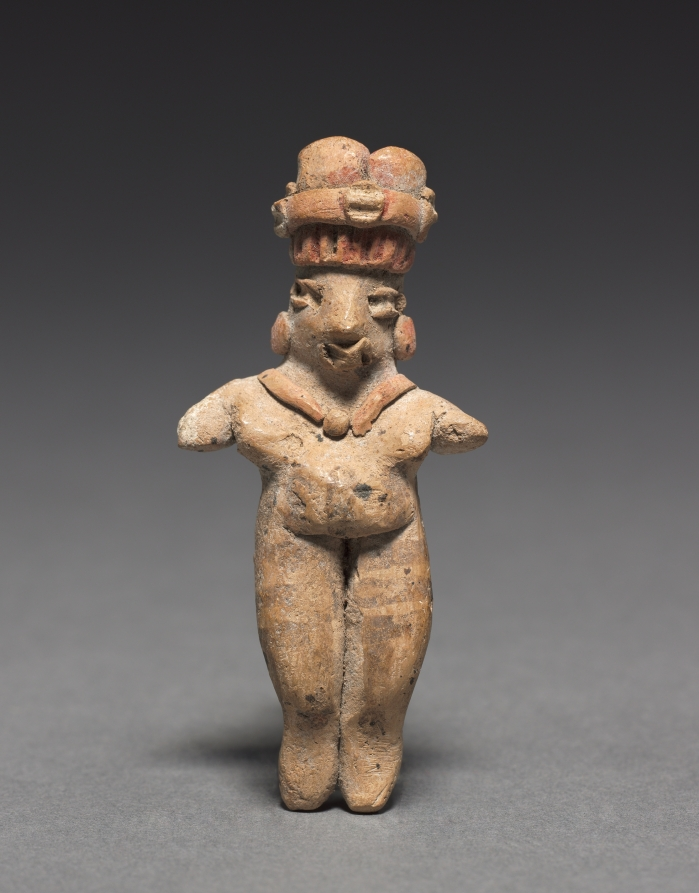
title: Female Figurine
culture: Mesoamerica, Mexico, Guanajuato, Chupícuaro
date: c. 400–100 BCE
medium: earthenware with pigment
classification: Sculpture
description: Small, solid, hand-modeled figurines were a staple of the early Mesoamerican artistic repertoire. Made in distinctive styles corresponding to geographic regions, they likely were used in a variety of contexts, including rites to assure health, fertility, and prosperity. This example is from the Chupícuaro region, north of modern-day Mexico City.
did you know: This figurine is small enough to fit comfortably in the palm of your hand.